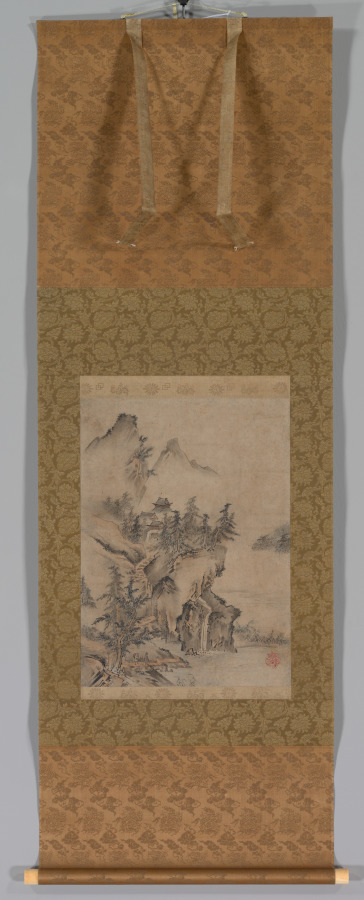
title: Chinese Literatus Traveling to a Mountain Temple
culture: Japan, Muromachi period (1392–1573)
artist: Kano Hidemasa (Japanese, active late 1500s)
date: late 1500s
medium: hanging scroll; ink and light color on paper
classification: Painting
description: This painting bears the seal of Kano Hidemasa, believed to be the son of Kano Hideyori (active mid- to late 1500s) of the important and prolific Kano family of painters. It features a traveler and his servant in a Chinese setting. The two are on their way to a temple up the stairs, climbing the steep slope of the mountain ahead of them. The traveler, who wears clerical garb, has paused to admire and listen to the sound of a nearby waterfall. The painting is a charming interpretation of a scene that might be found in Song dynasty album leaves imported to Japan.